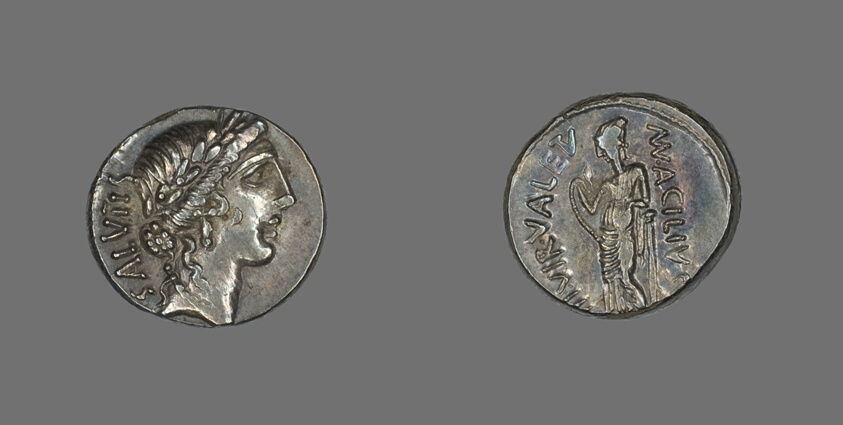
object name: Coin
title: Denarius (Coin) Depicting the Goddess Salus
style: roman (ancient, style or period), ancient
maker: Roman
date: about 49 BCE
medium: Silver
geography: Roman Empire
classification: coin; ancient art